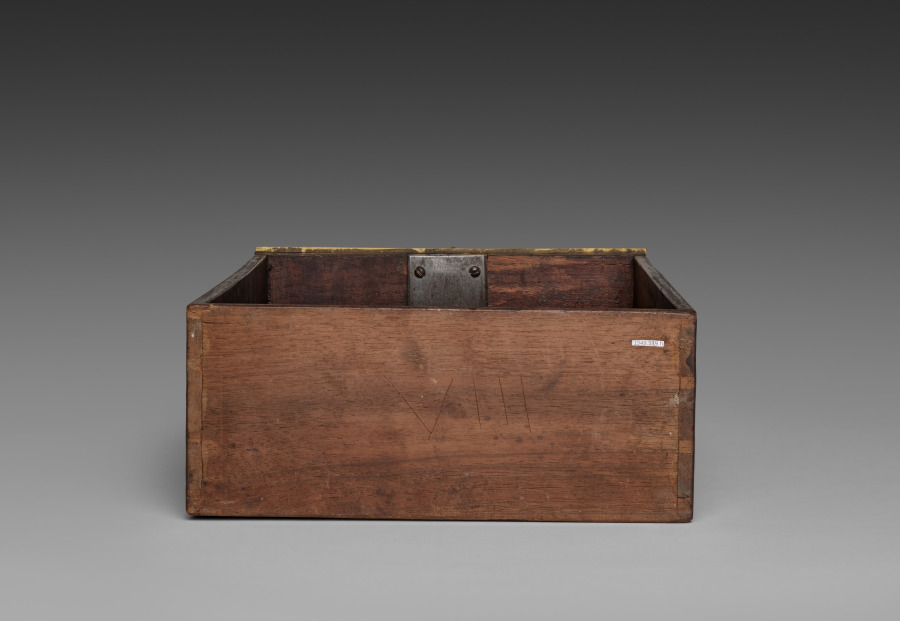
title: Side Drawer for Cabinet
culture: France, late 17th Century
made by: André-Charles Boulle (French, 1642–1732)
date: c. 1690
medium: ebony, marquetry in metal and tortoise shell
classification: Furniture and woodwork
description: Appointed cabinetmaker to King Louis XIV in 1672, André-Charles Boulle became a master of furniture making in France during the late 1600s until his death in 1732. Known primarily for his use of marquetry, in which metal patterns are inlaid into tortoiseshell then applied within the veneered surface of the furniture, Boulle established a level of quality and craftsmanship few others could achieve. As a result, his work found favor at the royal court and among other aristocrats and diplomats eager to impress the king. The inclusion of a medallion depicting Louis XIV within the bronze decoration of this chest would have identified the owner with the royal court. Often exhibiting stout architectural proportions with elegant groups of inlaid motifs such as the parrot on the central panel of this chest, Boulle’s designs are an example of the intellectual fashion for contrasting ideas, materials, and motifs.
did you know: Originally designed to sit atop an elaborate tall stand, this chest was likely altered in the late 1700s to reduce its scale and height.